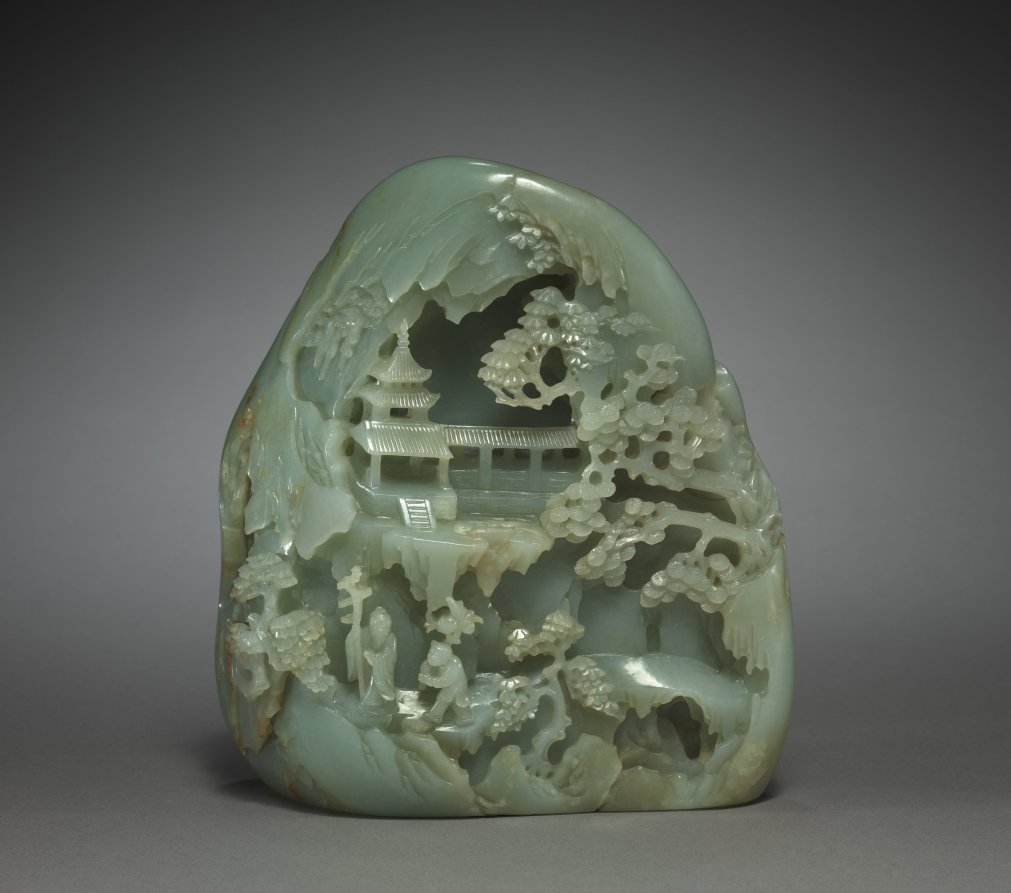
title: Miniature Mountain with Daoist Paradise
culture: China, Qing dynasty (1644–1911), Qianlong reign (1736–95)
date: 1736–95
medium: green jade with brown markings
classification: Jade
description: Sizable jade boulders of mountainous landscapes were carved to represent the search for the paradise or immortals' dwellings in the mountains. This Daoist theme has fired the Chinese imagination throughout history. Believed to have spiritual and magical properties, jade has long been used in tombs and intended for preserving the corporeal body and the soul in the quest for eternity. It is recorded that Daoist practitioners drank morning dews with scraps of jade as an elixir of immortality.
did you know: The bearded immortal is accompanied by a servant carrying a cluster of peaches, symbols of immortality.